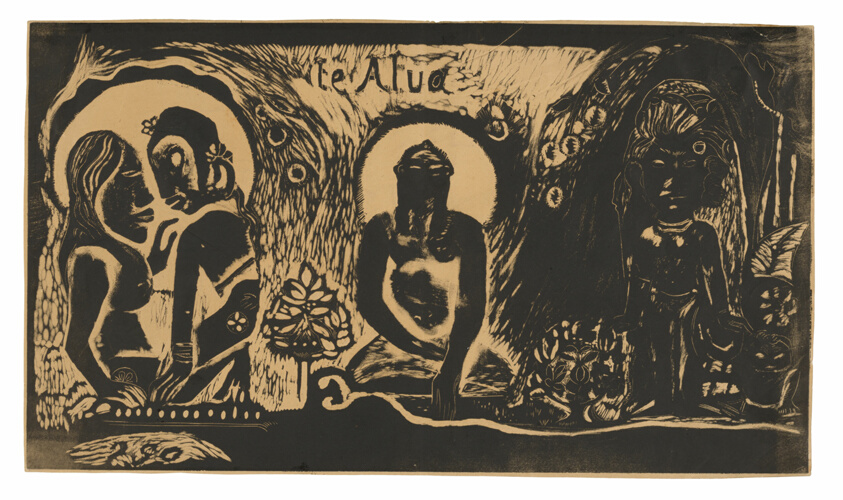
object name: Print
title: Te atua (The God), from the Noa Noa Suite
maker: Paul Gauguin (French, 1848-1903)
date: 1893/94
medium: Wood-block print in black ink on tan wove paper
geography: France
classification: woodcut; print; prints and drawing